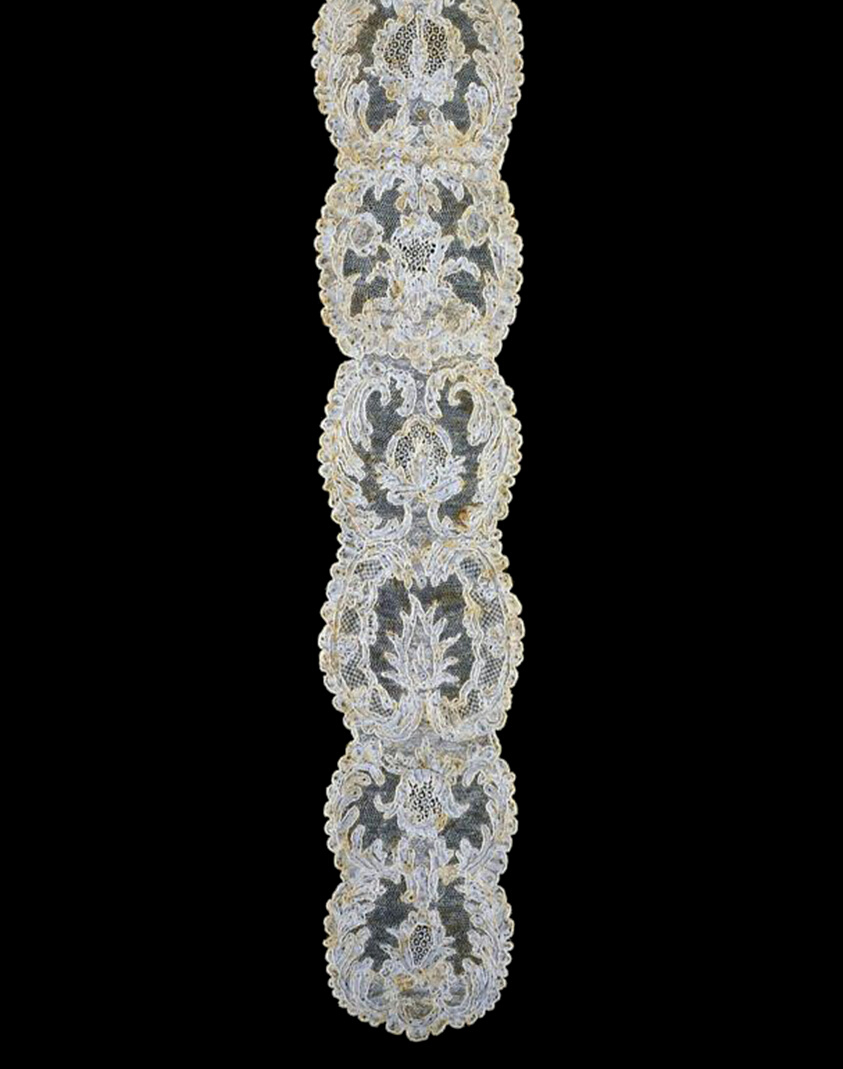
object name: Costume and Accessories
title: Pair of Lappets (Joined)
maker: France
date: 1725/35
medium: Linen, needle lace of a type known as "Point d'Alençon"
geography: France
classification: costume accessory; lace - needle; textile; costume; costume accessory - headdress; costume accessory worn above the waist